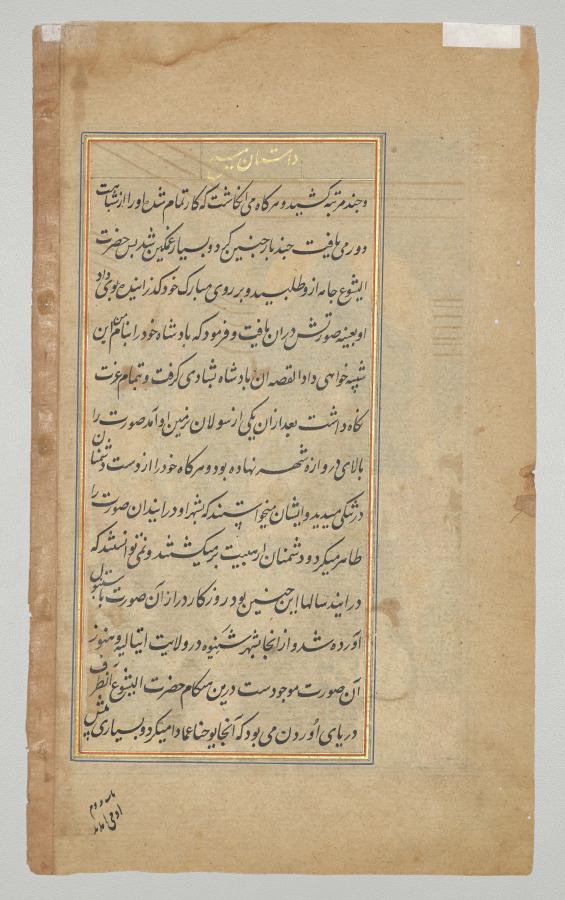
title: Text page from a Mirror of Holiness (Mir’at al-quds) of Father Jerome Xavier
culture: Mughal India, Allahabad, made for Prince Salim (1569–1627)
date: 1602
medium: Ink and gold on paper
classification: Manuscript